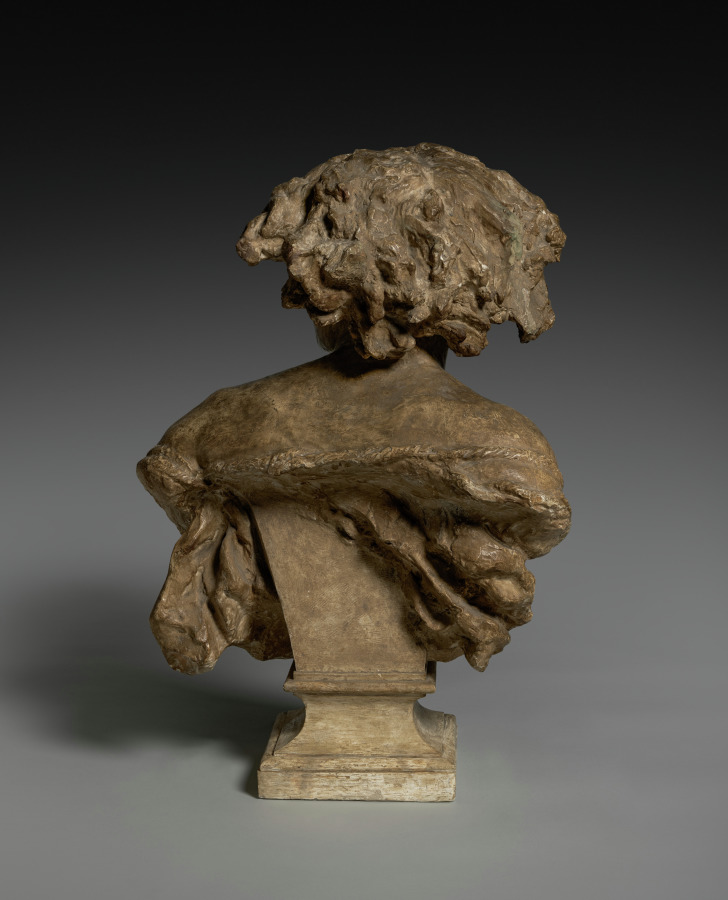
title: Why Born Enslaved!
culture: France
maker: Jean-Baptiste Carpeaux (French, 1827–1875)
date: 1867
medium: Plaster, original polychromed surface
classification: Sculpture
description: One of the most powerful expressions of abolitionist sentiment in the visual arts, Why Born Enslaved! depicts an African woman bound by ropes and looking defiantly upward. The ropes press painfully into her breasts; her torn blouse alludes to the violence responsible for her condition. The original, polychromed surface is covered with complex, nuanced hatchings and subtle modeling. Evidence indicates that this masterpiece of 19th-century French sculpture served as the master model for numerous casts in other museum collections.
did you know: Although officially abolished in France since 1848, slavery remained a hotly contested issue in Carpeaux’s time as it remained legal or tolerated in various countries around the world.